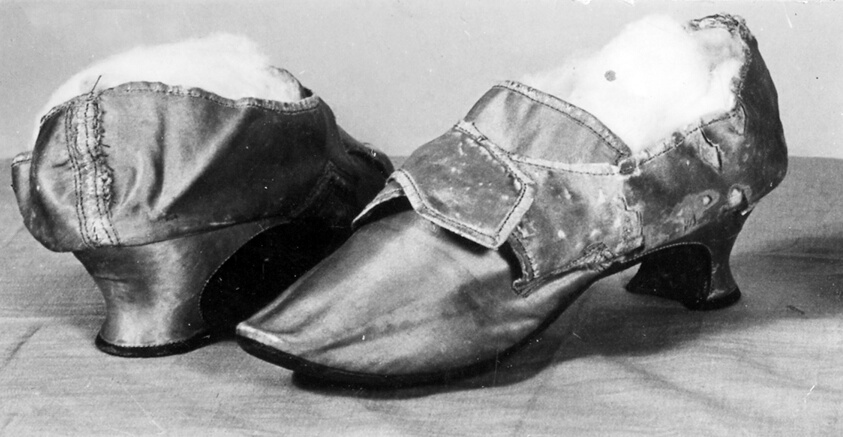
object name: Costume and Accessories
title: Woman's Shoes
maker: England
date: 1770s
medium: Leather, silk, satin, weave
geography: England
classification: textile; shoes - misc; costume accessory - shoe; costume; dress (garment); clothing